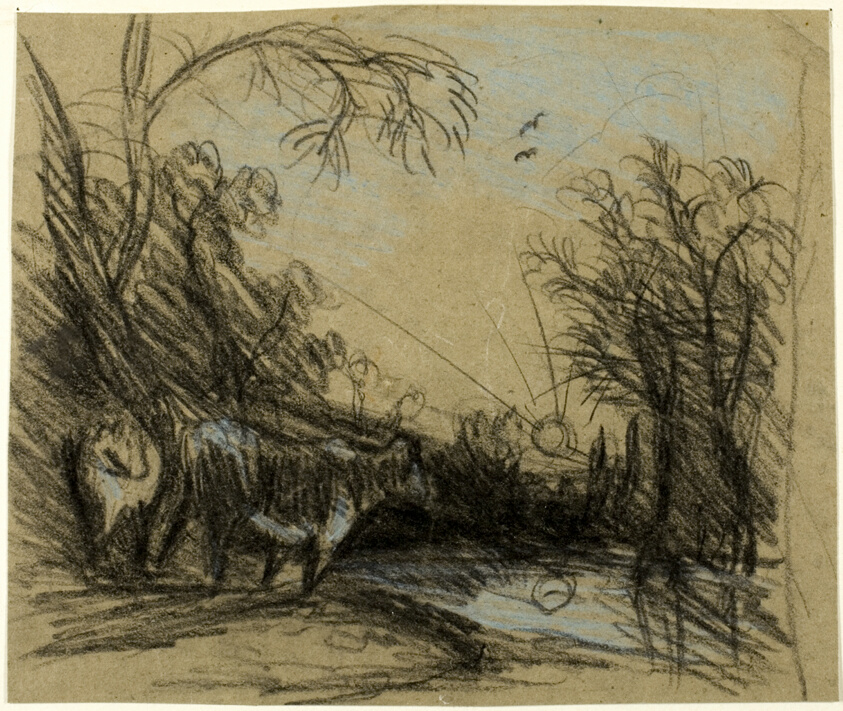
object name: Drawing and Watercolor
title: Landscape with Cows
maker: John Constable (English, 1776-1837)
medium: Black and blue pastel on brown wove paper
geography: England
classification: pastel; drawings (visual works); prints and drawing